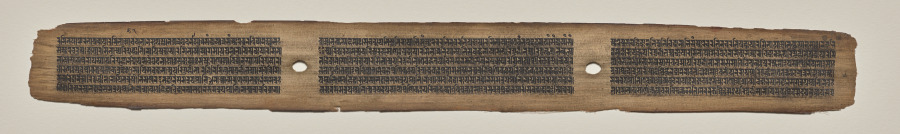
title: Text, folio 4 (recto), from a Manuscript of the Perfection of Wisdom in Eight Thousand Lines (Ashtasahasrika Prajnaparamita-sutra)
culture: Eastern India, Bihar, Vikramashila Monastery. Painting: Nepal, Kathmandu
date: Sunday, September 14, 1119 (year 239 of the Newar Samvat in the month of Ashvina)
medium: Gum tempera and ink on palm leaf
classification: Painting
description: This manuscript, consisting of 188 double-sided folios, was calligraphed by a scribe at a monastery in northeastern India, commissioned by a monk from Nepal.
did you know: The text is written using lamp black ink made from mixing carbon, gum Arabic, and water.